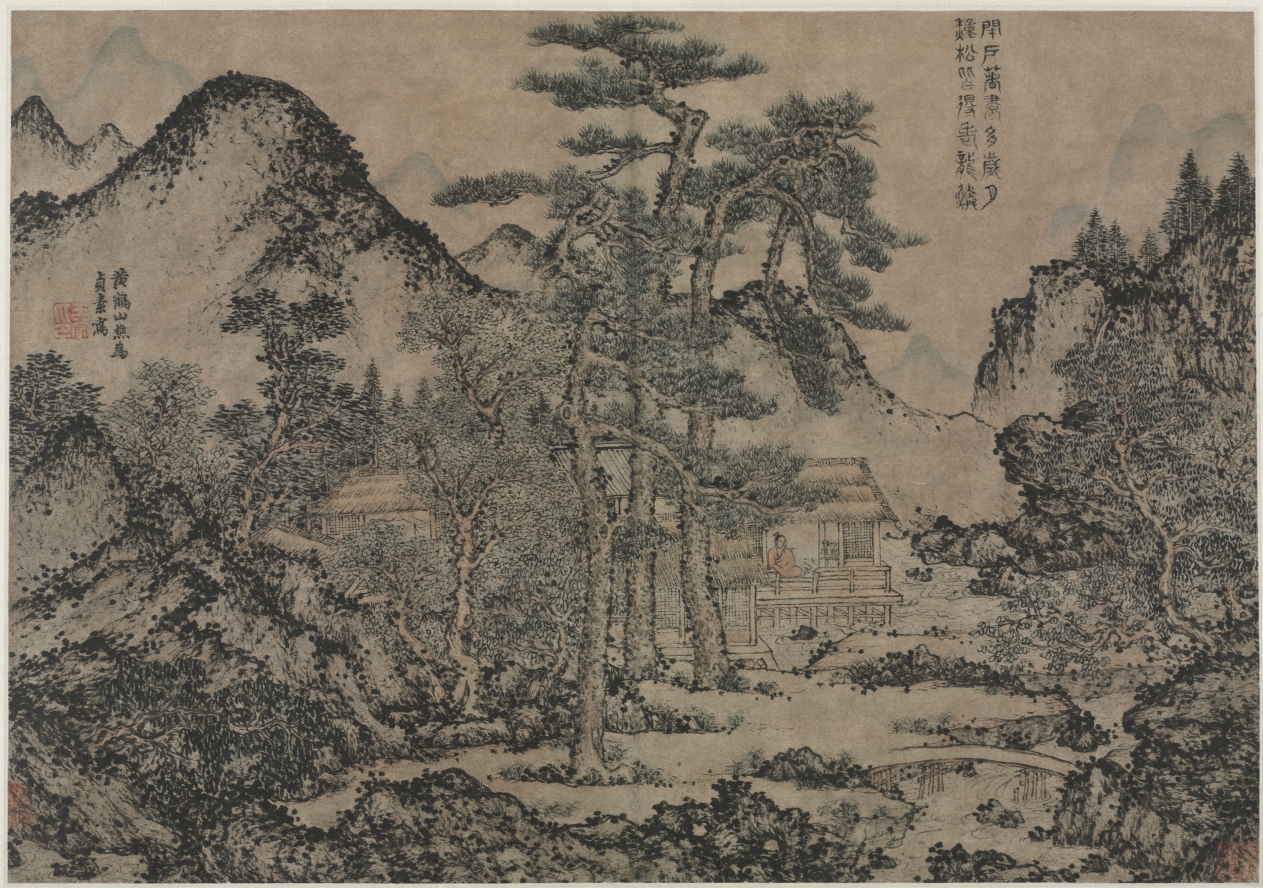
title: Writing Books under the Pine Trees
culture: China, Yuan dynasty (1271-1368)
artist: Wang Meng (Chinese, c. 1308–1385)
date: c. 1308–85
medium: Album leaf; ink and color on paper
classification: Painting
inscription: Artist's inscription, signature, and seal: Many years and months passed by the locked gate/ Behind which the scholar has been immersed in writing his books;/ While the pine trees he had planted/ Have all grown up with old dragon scales./ The Yellow Crane Mountain Woodcutter [Huang-ho-shan-ch'iao] painted this for Chen-su [the hao of Ts'ao Chih-po]. [seal] Wang Meng yin.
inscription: 2 additional seals: 1 of Ts'ao Chih-po (1271–1355); 1 unidentified.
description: Wang Meng, born into a distinguished family in Wuxing (modern Huzhou), Zhejiang province, was the maternal grandson of Zhao Mengfu (1254–1322). Aside from intermittent political commitments under the foreign Mongol and Ming governments, Wang dedicated most of his life to retirement, as conveyed in this painting. By the 1360s, when the Red Turbans began to rebel against the Yuan dynasty leaders, and the Mongols gradually lost control over Jiangnan, Wang Meng withdrew into the mountains north of Hangzhou, calling himself Woodcutter of Yellow Crane Mountain. In the early years of the Ming dynasty, Wang was caught up in a purge and died in prison.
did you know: Wang Meng wrote the inscription at the right in classical seal script and applied his signature and seal on the left side of the composition.